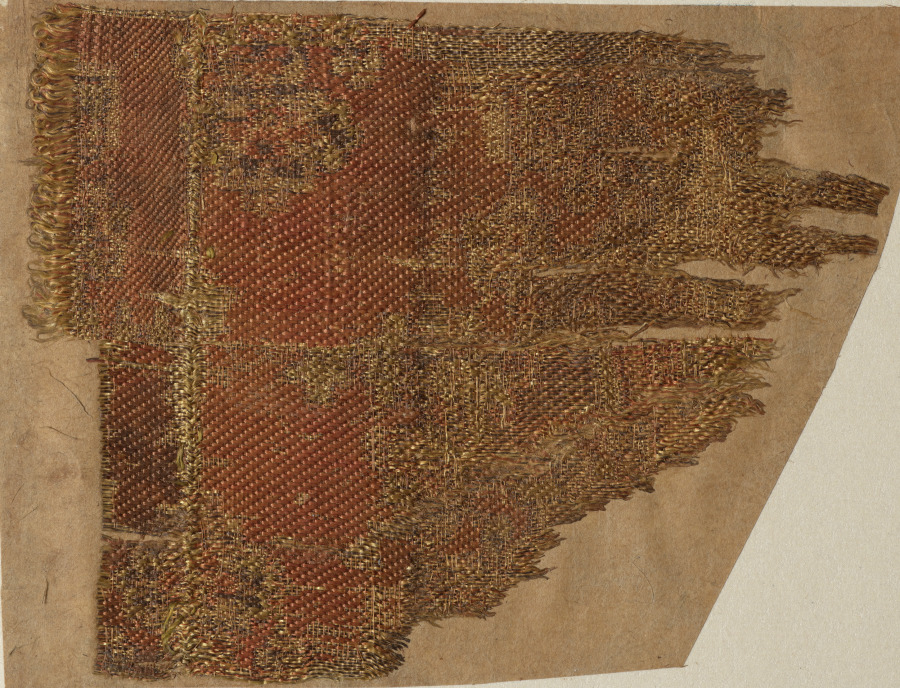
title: Fragment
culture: China, 8th century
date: 700s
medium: compound twill, silk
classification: Textile